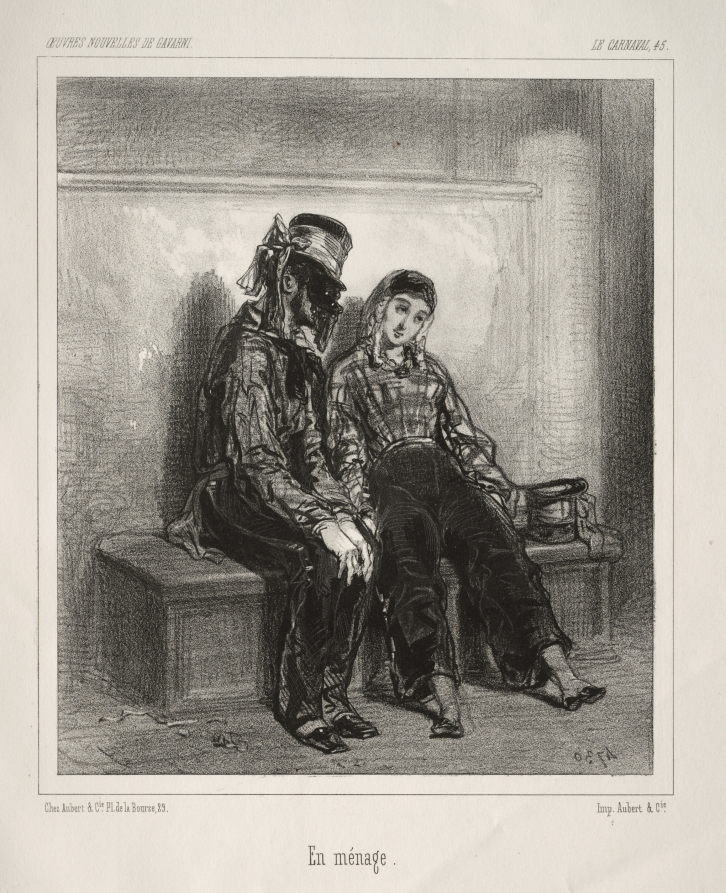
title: Carnaval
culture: France, 19th century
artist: Paul Gavarni (French, 1804–1866)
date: c. 1841–47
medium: lithograph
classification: Print